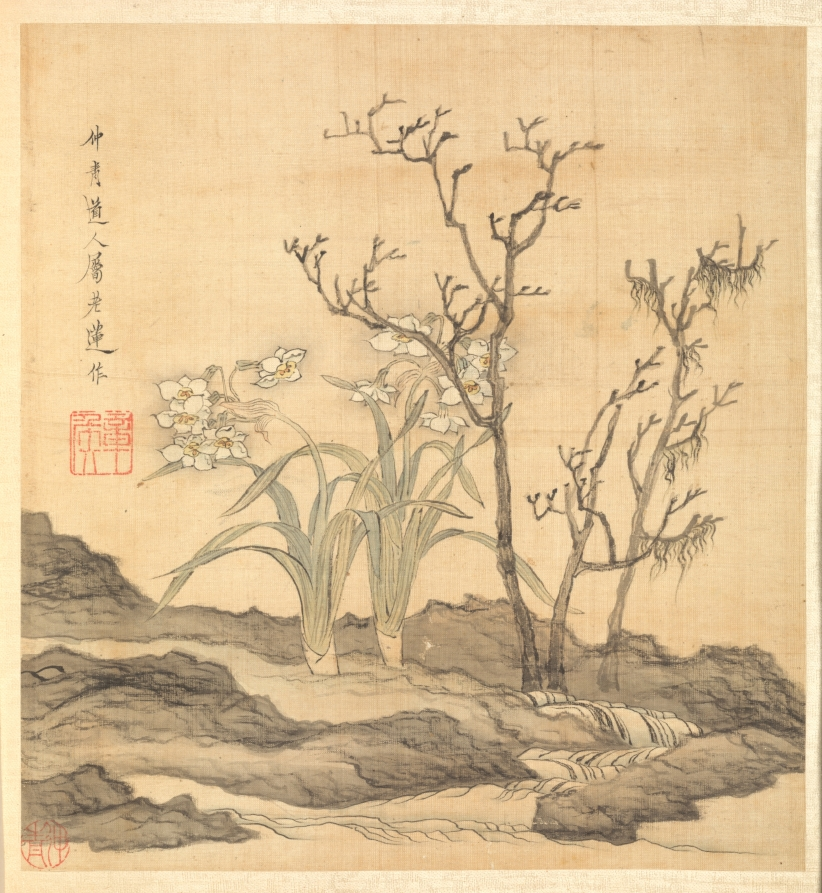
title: Paintings after Ancient Masters: Narcissus and Bare Trees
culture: China, Ming dynasty (1368–1644)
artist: Chen Hongshou (Chinese, 1598/99–1652)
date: 1598–1652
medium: album leaf; ink and color on silk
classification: Painting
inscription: The Daoist Zhongqing entrusted Laolian to paint [this]. [Seal] Zhanghou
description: The twenty paintings in this double album by Chen Hongshou include landscapes, figures, and flowers. It also has one leaf featuring a woman, an often-used subject not found in the other albums from the latter part of his career. His late works are wonderful summations of Chen's peculiar and quirky art—archaistic, hyper-refined—but without accompanying shallowness or sentimentality. His figures and landscapes in the late albums are miniaturized, not unlike the small Chinese gardens, or the carefully selected small table rocks or old roots used for contemplation to see the world in miniature. This loss of scale is quite deliberate and reflects the psychological situation of a depressed class like the Ming loyalist officials and scholars, deprived of their integrity and honor, and forced to lead a diminished and restricted existence.